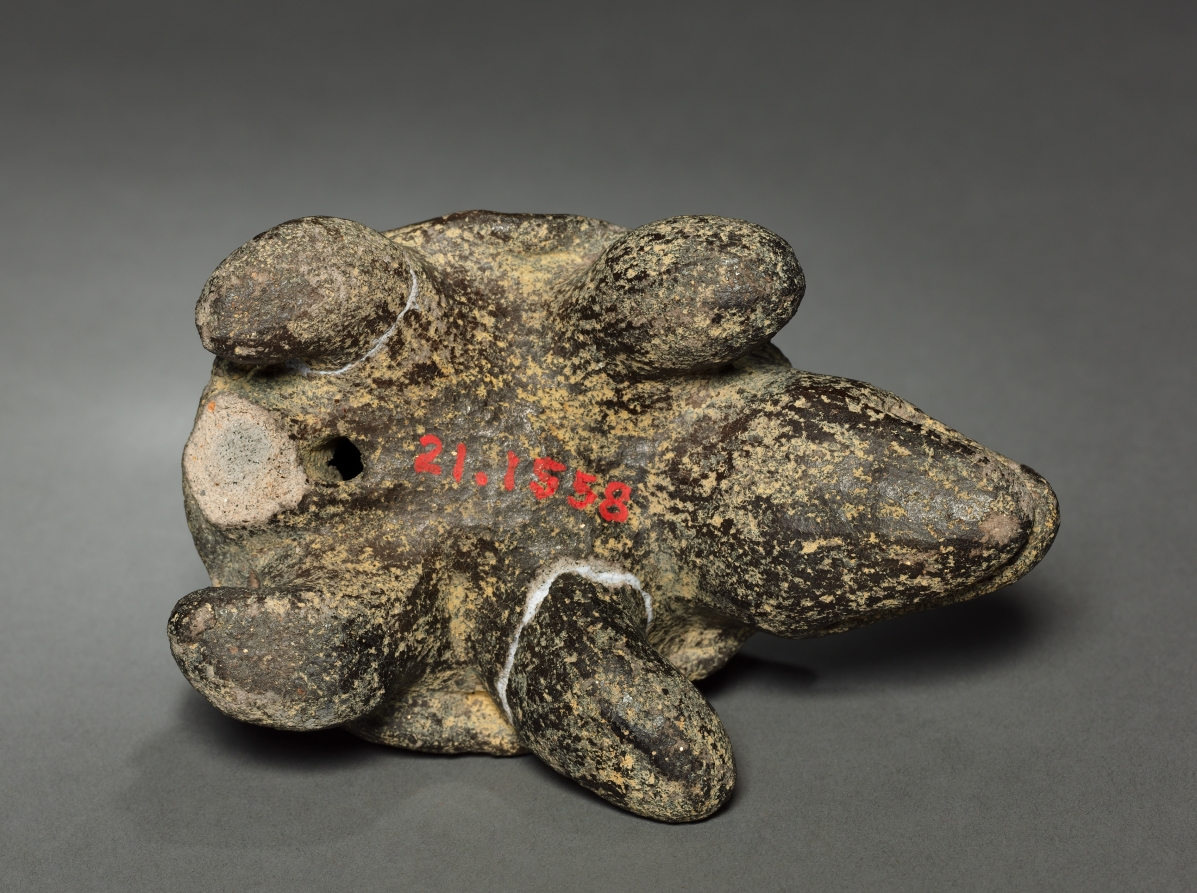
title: Turtle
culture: Colombia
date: before 1921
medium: pottery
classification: Ceramic